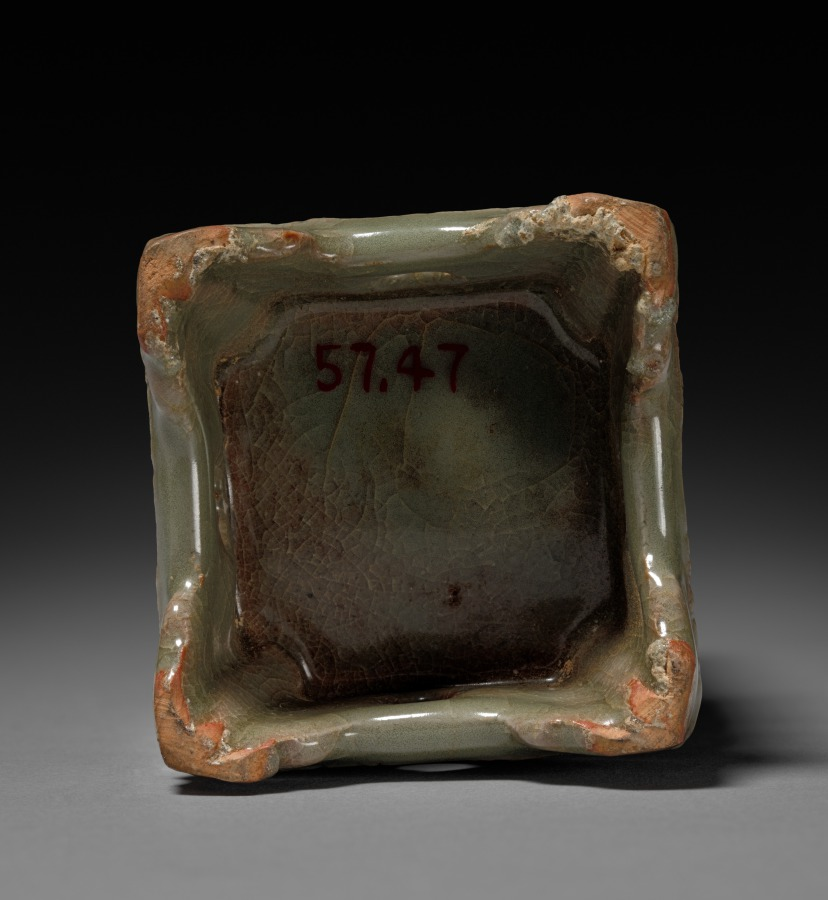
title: Vase in Shape of Cong: Southern Celadon Ware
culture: China, Zhejiang province, Yuan dynasty (1271-1368)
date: 1271–1368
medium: glazed buff stoneware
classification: Ceramic